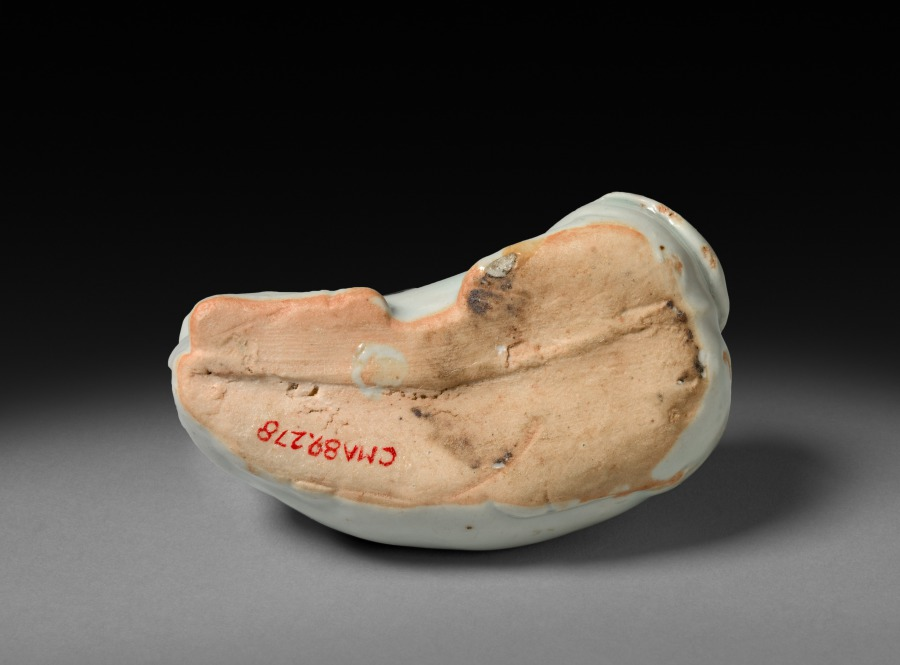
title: Buffalo with Rider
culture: China, Jiangxi Province, Jingdezhen kilns, Yuan dynasty (1271–1368)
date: early 1300s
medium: glazed porcelain with iron spots, qingbai ("blue-white") ware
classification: Ceramic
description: Boys tending buffalos were associated with a carefree life in the countryside free from the duties of officialdom. Water droppers contained water that was used to dissolve ink sticks into liquid ink for brush painting and writing.